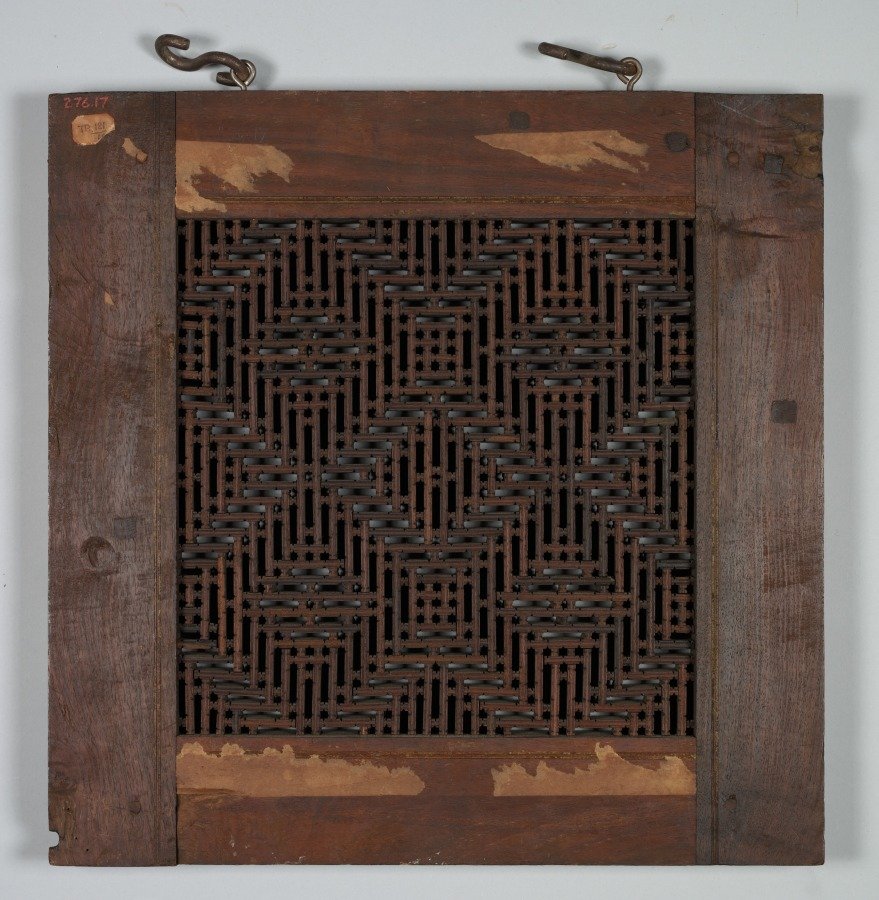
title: Panel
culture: Syria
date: 1800s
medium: wood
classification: Wood